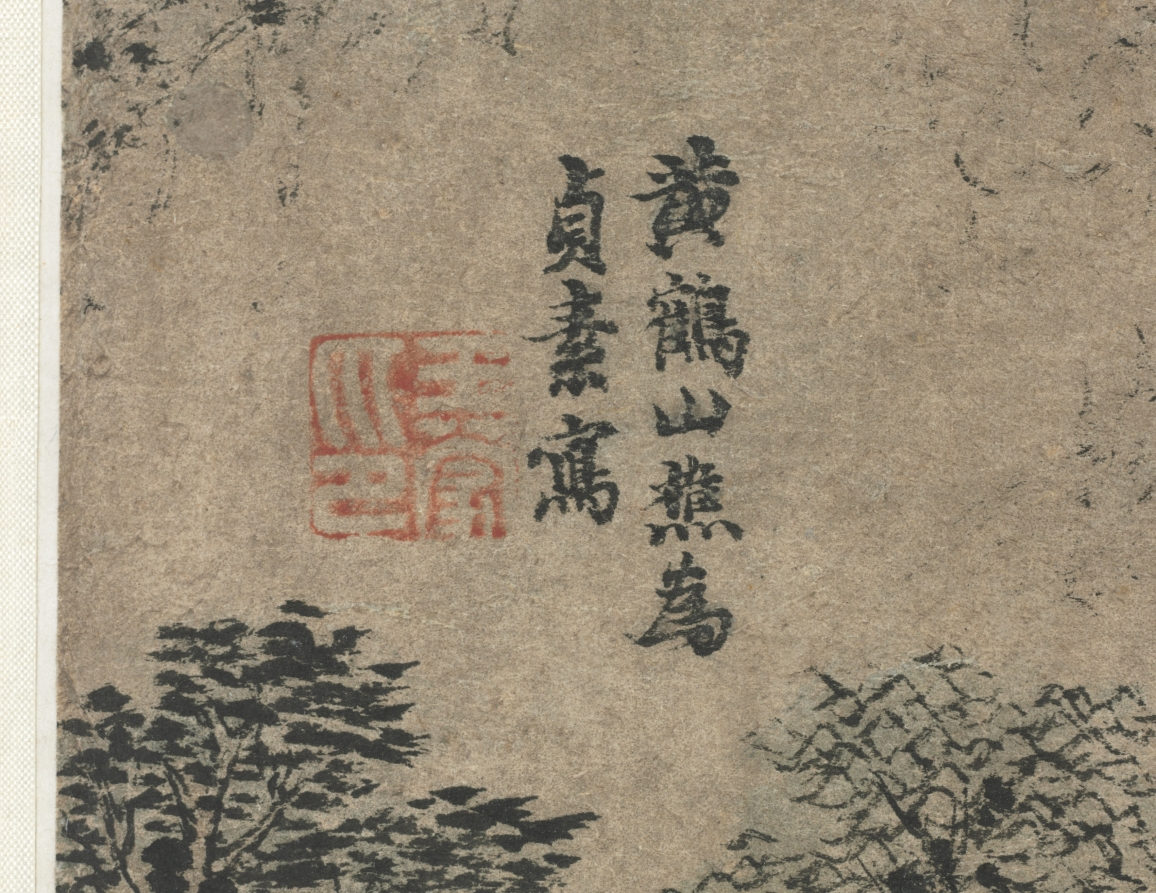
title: Writing Books under the Pine Trees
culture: China, Yuan dynasty (1271-1368)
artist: Wang Meng (Chinese, c. 1308–1385)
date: c. 1308–85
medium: Album leaf; ink and color on paper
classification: Painting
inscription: Artist's inscription, signature, and seal: Many years and months passed by the locked gate/ Behind which the scholar has been immersed in writing his books;/ While the pine trees he had planted/ Have all grown up with old dragon scales./ The Yellow Crane Mountain Woodcutter [Huang-ho-shan-ch'iao] painted this for Chen-su [the hao of Ts'ao Chih-po]. [seal] Wang Meng yin.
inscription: 2 additional seals: 1 of Ts'ao Chih-po (1271–1355); 1 unidentified.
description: Wang Meng, born into a distinguished family in Wuxing (modern Huzhou), Zhejiang province, was the maternal grandson of Zhao Mengfu (1254–1322). Aside from intermittent political commitments under the foreign Mongol and Ming governments, Wang dedicated most of his life to retirement, as conveyed in this painting. By the 1360s, when the Red Turbans began to rebel against the Yuan dynasty leaders, and the Mongols gradually lost control over Jiangnan, Wang Meng withdrew into the mountains north of Hangzhou, calling himself Woodcutter of Yellow Crane Mountain. In the early years of the Ming dynasty, Wang was caught up in a purge and died in prison.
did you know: Wang Meng wrote the inscription at the right in classical seal script and applied his signature and seal on the left side of the composition.